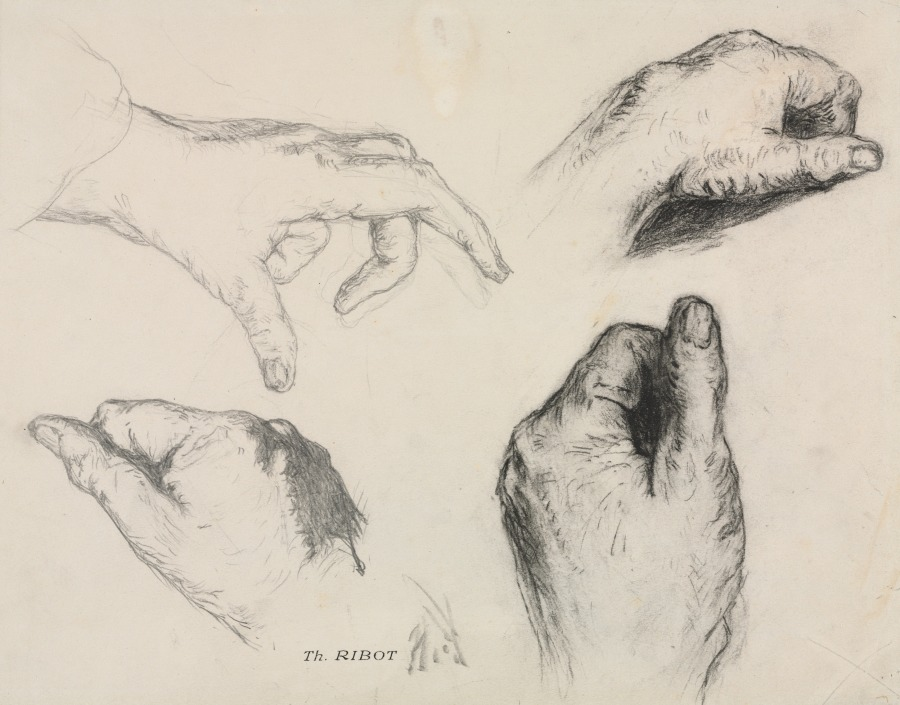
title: Study of Hands (recto); Study of a Woman's Hand (verso)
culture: France, 19th century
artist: Théodule Ribot (French, 1823–1891)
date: 1800s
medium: black chalk and graphite (recto)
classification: Drawing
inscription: inscribed in black ink, lower center; "Th. Ribot (estate stamp)